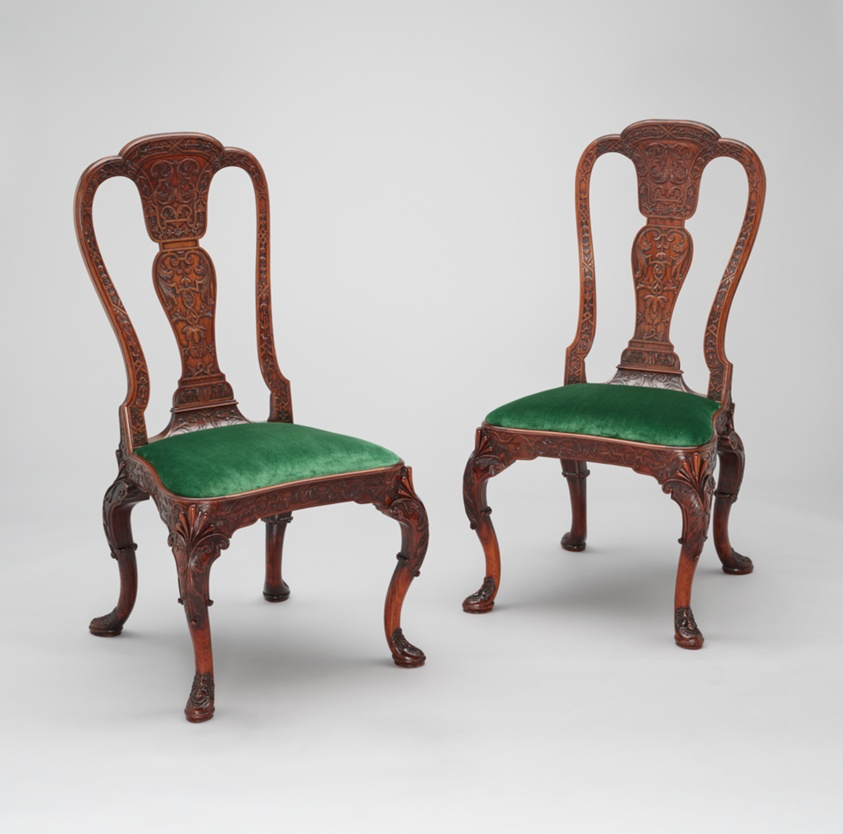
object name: Furniture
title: Chair (one of a pair)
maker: Chinese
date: c. 1730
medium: Padauk wood with textile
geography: China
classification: furniture; chair; european decorative arts